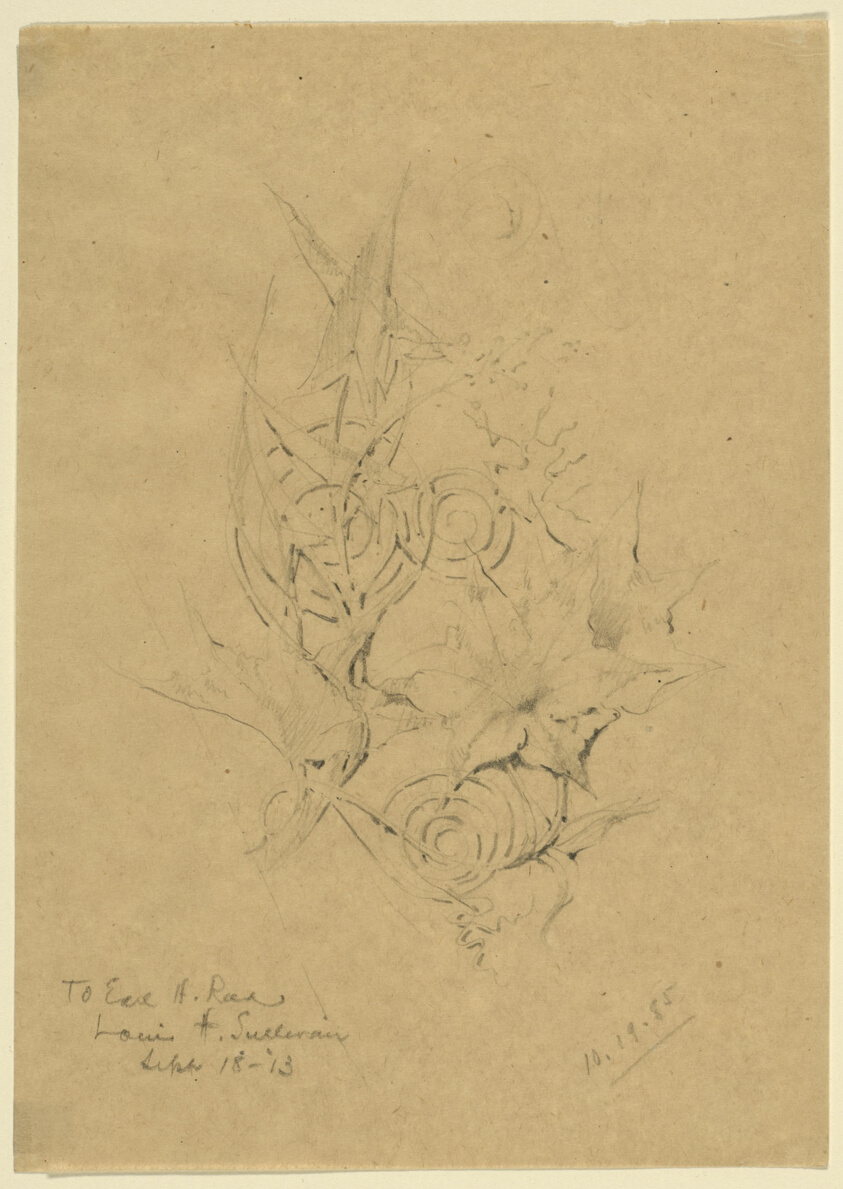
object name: Architectural Drawing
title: Plant Form Study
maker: Louis H. Sullivan (American, 1856-1924)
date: 1885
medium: Pencil on paper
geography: United States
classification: paper; architecture; architectural drawing